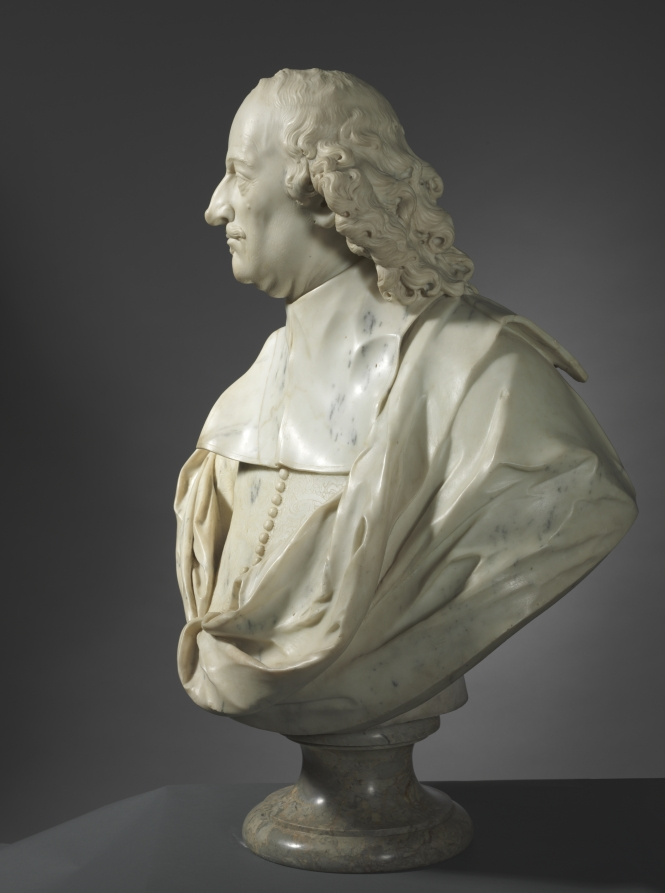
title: Portrait of Fabrizio Naro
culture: Italy, Rome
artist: Domenico Guidi (Italian, 1625–1701)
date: c. 1680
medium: marble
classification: Sculpture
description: This figure’s individualized facial expression, dynamic turn of the head and animated drapery are all characteristic of 17th-century Roman portrait sculpture. Guidi, a pupil of Alessandro Algardi, juxtaposed broad swaths of drapery and deeply drilled and carved hair with delicate surface detail, visible here in the patterning of the jacket and the faint suggestion of a beard. Based on a comparison with a later portrait on the family tomb in the church of Santa Maria sopra Minerva, Rome, the sitter has been identified as Fabrizio Naro (d. 1697), marquis of Mompei.